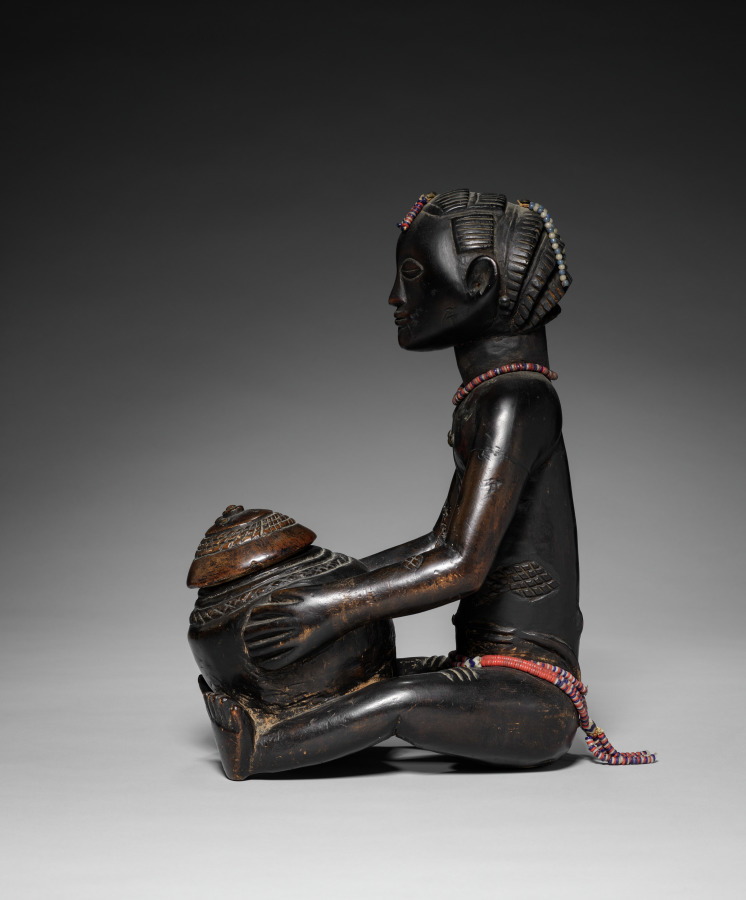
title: Female Bowl-Bearing Figure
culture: Africa, Central Africa, Democratic Republic of Congo, Luba-style carver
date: late 1800s-early 1900s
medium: Wood, glass beads, upholstery studs, plant fiber, and iron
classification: Sculpture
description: In Luba-style art, an object's beauty affects how well it works. While bowl-bearing figures had many possible uses, a royal diviner likely used this well-carved image of a woman carrying a bowl in rituals. Dusty traces of mpemba (white chalk) fleck the shining exterior and the bowl's interior, showing it once held this sacred powder. Diamond-shaped scarification marks at her waist, chest, and back add to her beauty. Her hair is carved into the cascading layered hairstyle worn in the Luba region at the turn of the twentieth century. Strands of imported glass beads encircle her waist and neck, and dangle from her hair. The alternating white and blue beads may symbolize the moon and Mbidi Kiluwe, a culture hero linked to royal practice and smithing. While much Luba-style art depicts women—who are societally important—men created and owned the majority of such works.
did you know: Symbolic of anvils, the round metal tacks decorating the figure's hair "pin" spirits and their secrets within it. They are at the hairline and each of the four hair cascades (the bottommost is now gone).